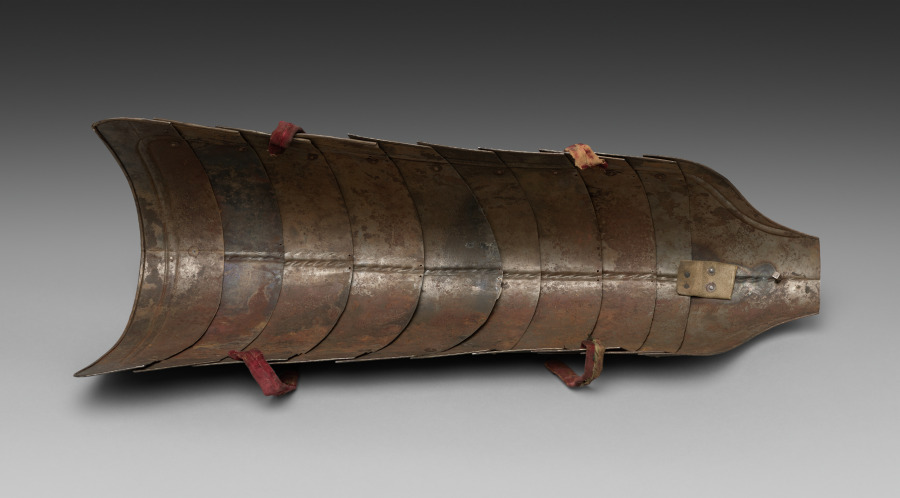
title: Horse's Crinet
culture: Germany, 19th century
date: 1801–1900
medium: steel with black paint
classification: Arms and Armor